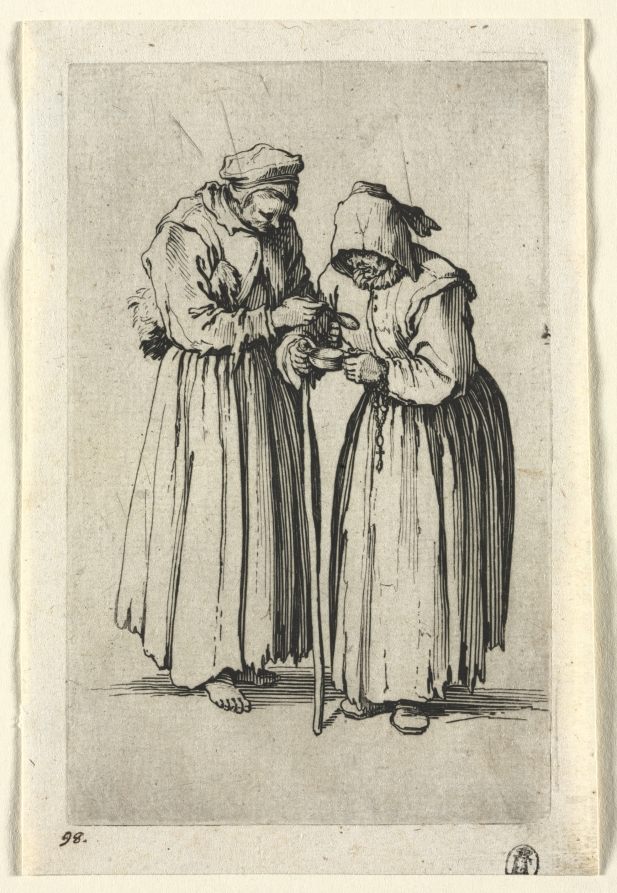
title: The Beggars: Two Beggar Women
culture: France, 17th century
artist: Jacques Callot (French, 1592–1635)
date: c. 1623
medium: etching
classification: Print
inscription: Inscribed lower left in pen and brown ink: "98."